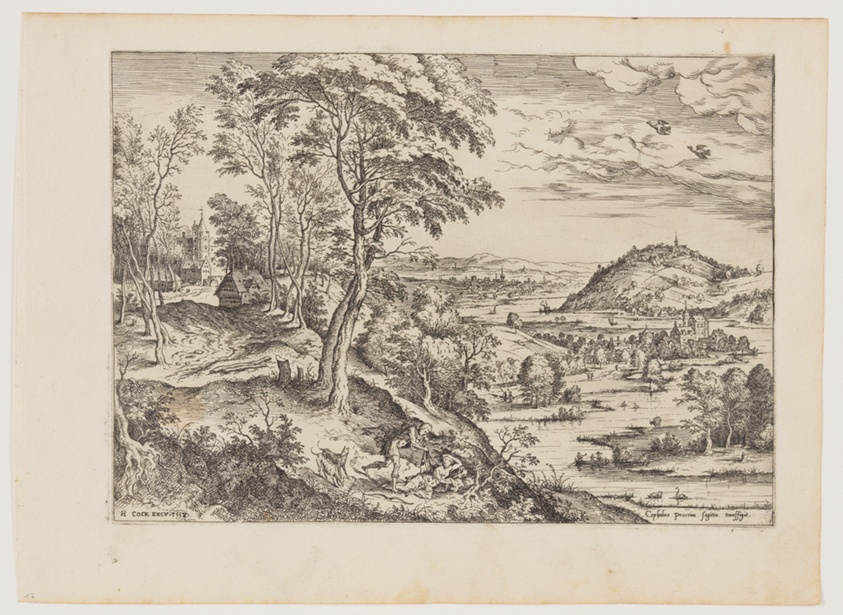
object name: Print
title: Cephalus and Procris, from Landscapes with Biblical and Mythological Scenes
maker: Hieronymus Cock (Netherlandish, c. 1510–1570); after Matthys Cock (Netherlandish, c. 1505-1548)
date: 1558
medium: Etching on ivory laid paper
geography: Netherlands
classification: etching; paper; print; prints and drawing